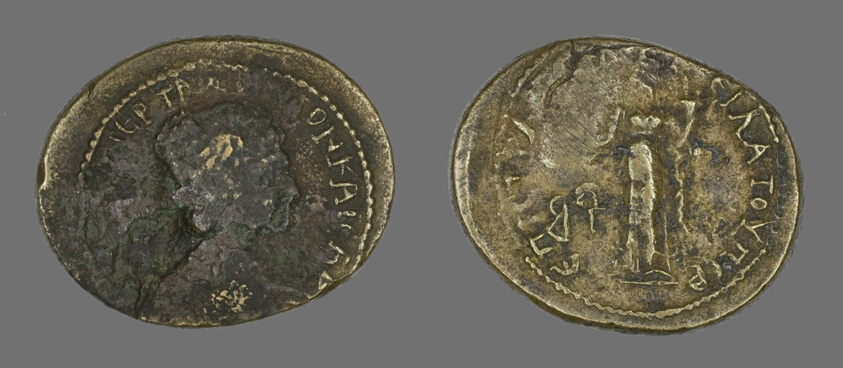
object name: Coin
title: Coin Depicting a Female Bust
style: imperial (roman), trajanic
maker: Roman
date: 98-117 (?)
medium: Bronze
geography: Rome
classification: coin; ancient art